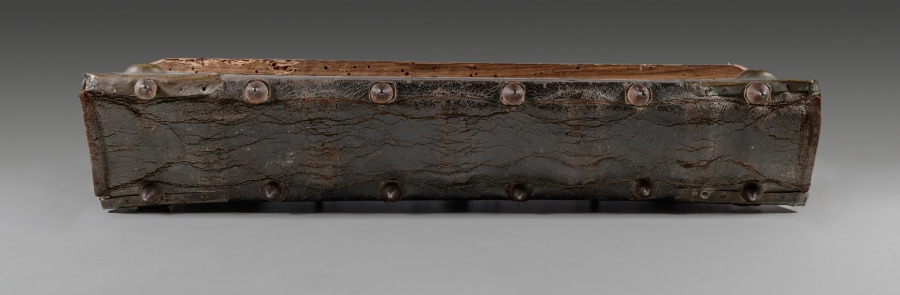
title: Gradual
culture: Italy, Verona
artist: circle of Girolamo dai Libri (Italian, 1474–1555)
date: c. 1520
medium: Ink, tempera, and gold on vellum; wood binding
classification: Manuscript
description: The liturgical book known simply as a “gradual” was the principal choir book used during the Mass. They were produced in multiple volumes, sometimes as many as 12, in order to cover the entire liturgical year. Every church required a set of graduals in addition to other liturgical books such as missals, antiphonaries, and gospel lectionaries. This volume appears to be the lone survivor from a larger set. Its illuminations were painted by an illuminator working in the circle of the much-esteemed and highly imitated painter Girolamo dai Libri of Verona, who was a prolific painter of altarpieces as well as illuminations for books.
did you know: Girolamo dai Libri was only 16 years old when he painted his first altarpiece.